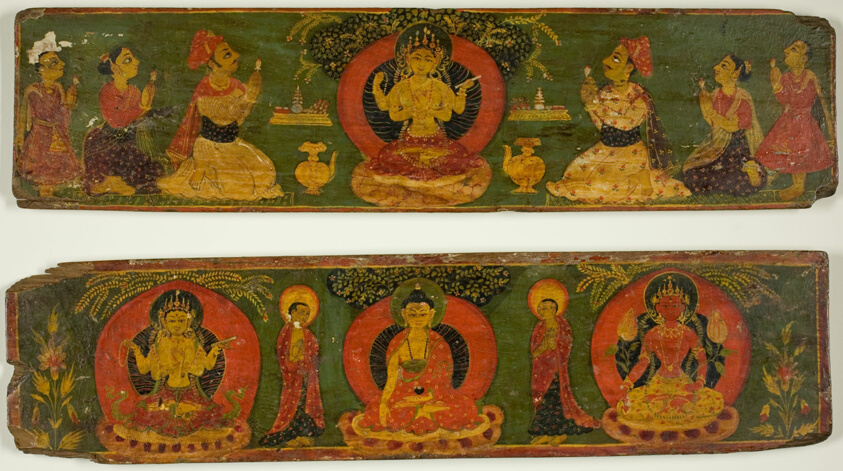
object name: Painting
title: One of a Pair of Manuscript Covers from the Perfection of Wisdom Sutra (Ashtasahasrika Prajnaparamita Sutra)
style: Himalayan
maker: Nepal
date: c. 17th century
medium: Pigments and metallic paint on wood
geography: Nepal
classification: painting